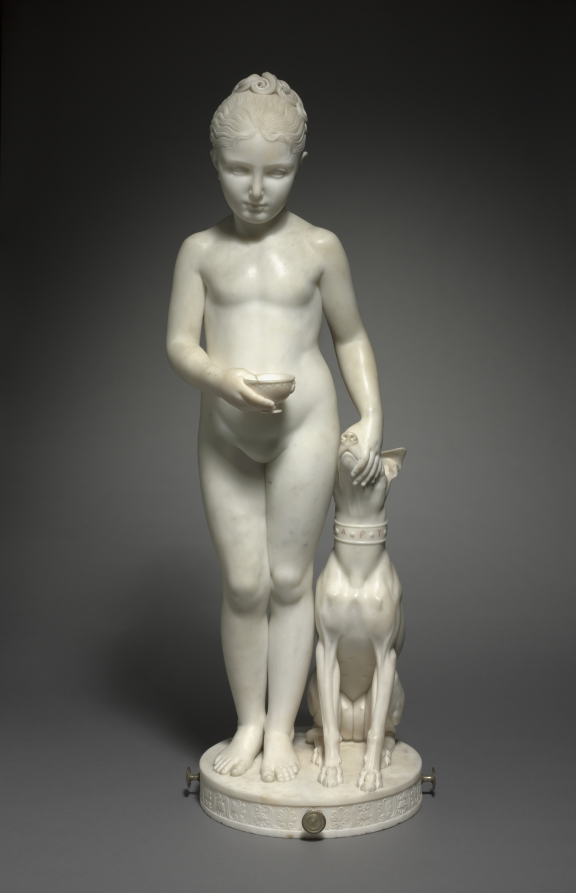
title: Portrait of Napoléone Elisa Baciocchi, Niece of Napoleon I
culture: Italy, 19th century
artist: Lorenzo Bartolini (Italian, 1777–1850)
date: 1810–12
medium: marble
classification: Sculpture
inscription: inscribed in Greek on dog's collar: ARTEMIS (letters originally filled with red pigment)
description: To extend power across the continent, Napoleon arranged for his sisters to marry into the courts of Europe. The sitter is his niece, daughter of the Grand-Duke of Tuscany (the bee on her cup is a Napoleonic emblem). While the girl’s nakedness might startle us today, in the early 1800s depicting children nude emphasized their purity and innocence. The work takes its cues from ancient sculpture, and while the pet dog adds a note of tenderness, it also refers to Diana, goddess of the moon and hunt.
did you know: Felice Pasquale Baciocchi, the father of the subject of this sculpture, was an avid violinist and studied with violin virtuoso Niccolò Paganini for a decade.